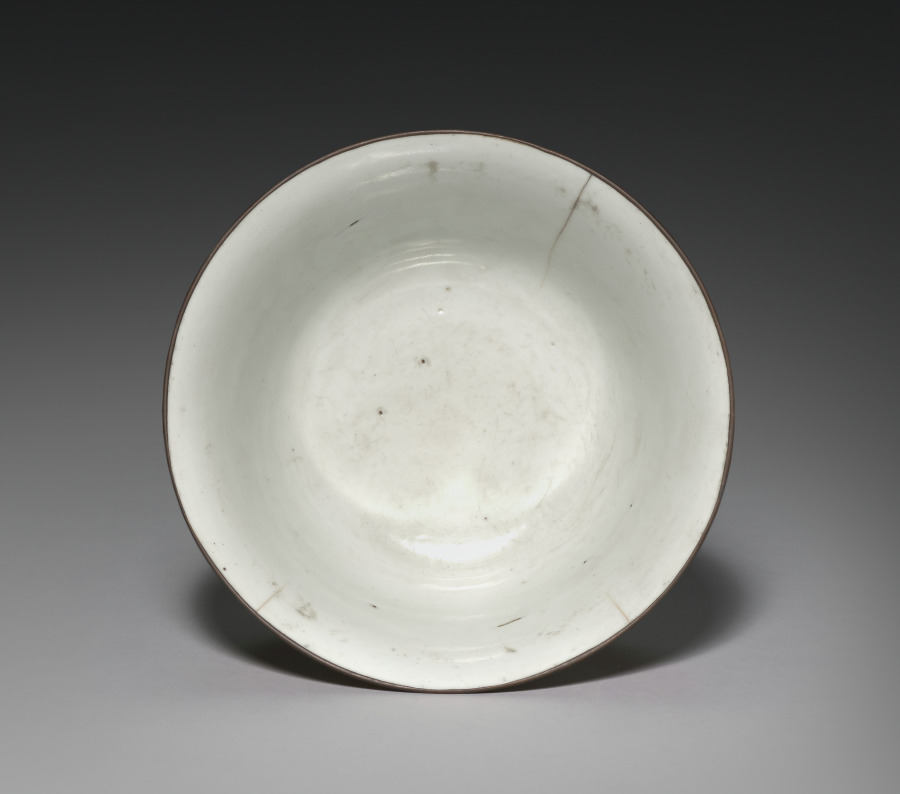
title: Chow Bowl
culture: Siam, 18th century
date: 1700s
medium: porcelain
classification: Metalwork